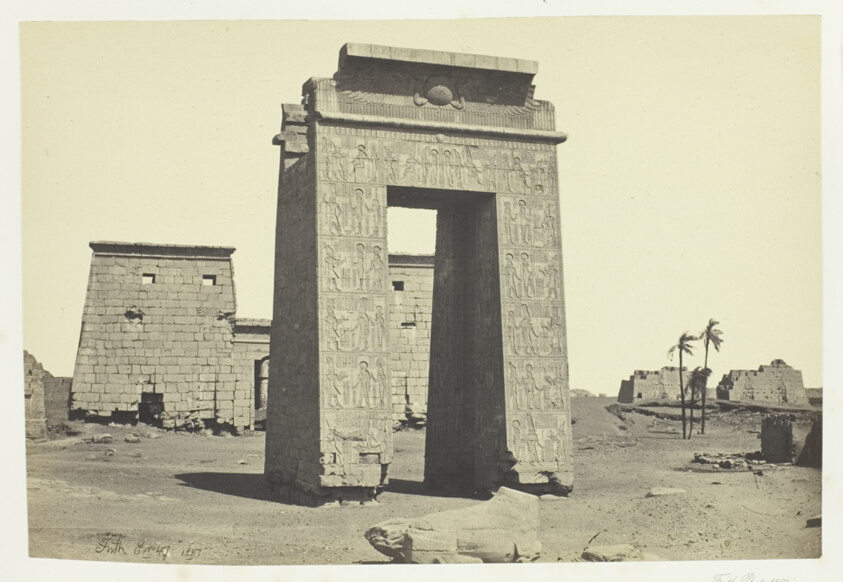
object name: Photograph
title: Sculptured Gateway, Karnac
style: 19th century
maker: Francis Frith (English, 1822–1898)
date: 1857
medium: Albumen print, pl. 25 from the album "Egypt and Palestine, Volume I" (1858)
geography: England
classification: photograph; albumen silver print; photography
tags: Collected by Hugh Edwards, Egypt and Palestine